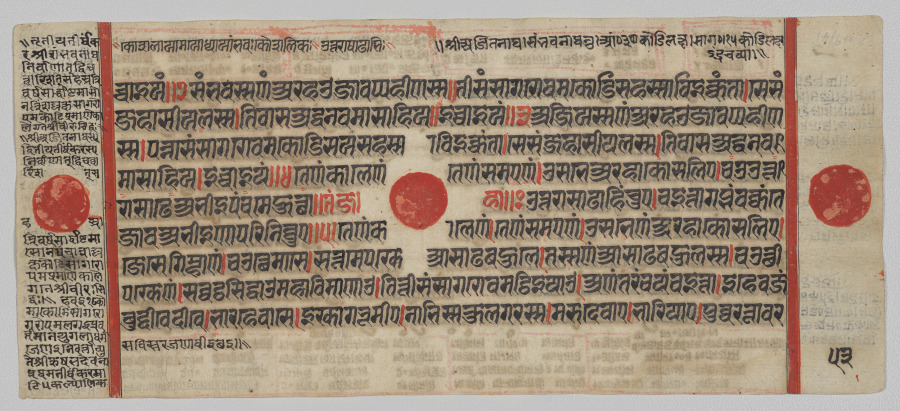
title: Text, Folio 53 (verso), from a Kalpa-sutra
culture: Western India, Gujarat, last quarter of the 15th century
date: c. 1475–1500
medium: Gum tempera, ink, and gold on paper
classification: Painting